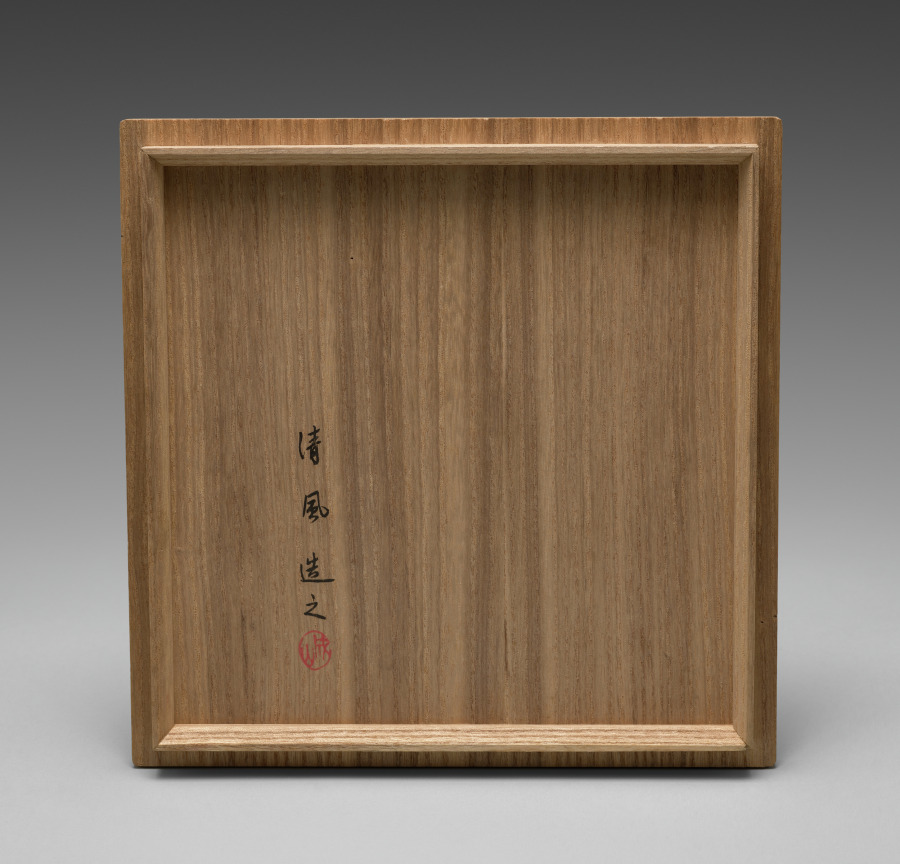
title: Guan-Shaped Vessel with Floral Scroll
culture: Japan, Taishō period (1912–26) or Shōwa period (1926–89)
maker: Seifū Yohei IV (Japanese, 1872–1951)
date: 1914–46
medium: Porcelain with molded and carved design and cream glaze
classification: Ceramic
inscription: 清風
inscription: 清風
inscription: 清風造之 【印】成山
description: Many of the vases created by Yohei III and IV were made with reference to and in emulation of Chinese ceramics in both form and glazing. The Seifu studio was inspired by later Chinese copies of two other archaic vessel types, the hu (Japanese ko) and guan (Japanese kan). In simple terms, in their original contexts, the hu and guan were storage jars that also appeared in ritual contexts. This hefty guan-shaped vase by Yohei IV has a floral scrolling pattern known in Japanese as karakusa, or “Chinese grasses.” The flowers are generally identified as lotus or peony. This flower vase might alternately be categorized as having the form of what is called a shukaiko in Japan, or a large vessel for holding wine. Shukaiko were created as early as the latter part of the Kamakura period after Yuan dynasty examples.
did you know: According to the box lid, the vase is a kanpakuji, "bright-jewel white porcelain," work.